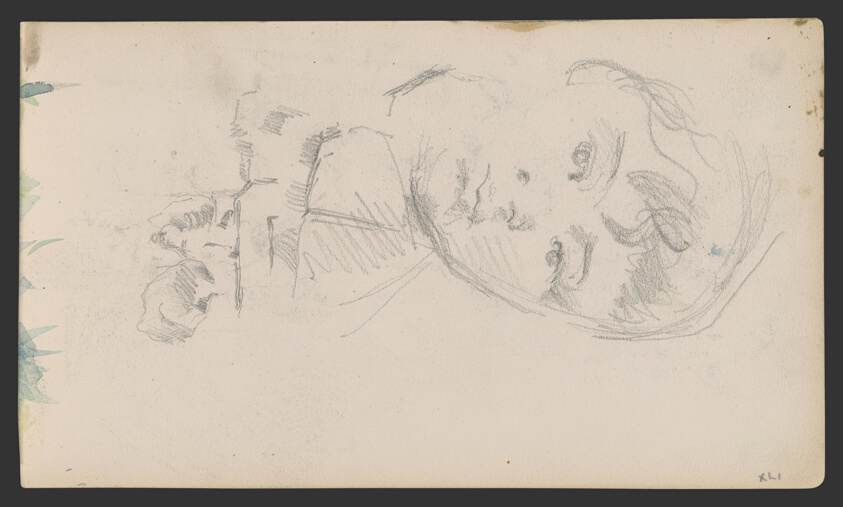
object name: Drawing and Watercolor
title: Sketchbook No. 2 (L'Estaque)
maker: Paul Cézanne; French, 1839-1906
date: 1875–86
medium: Graphite and pen and ink drawings on paper, bound into a book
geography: France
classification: sketchbook; graphite; prints and drawing; paper